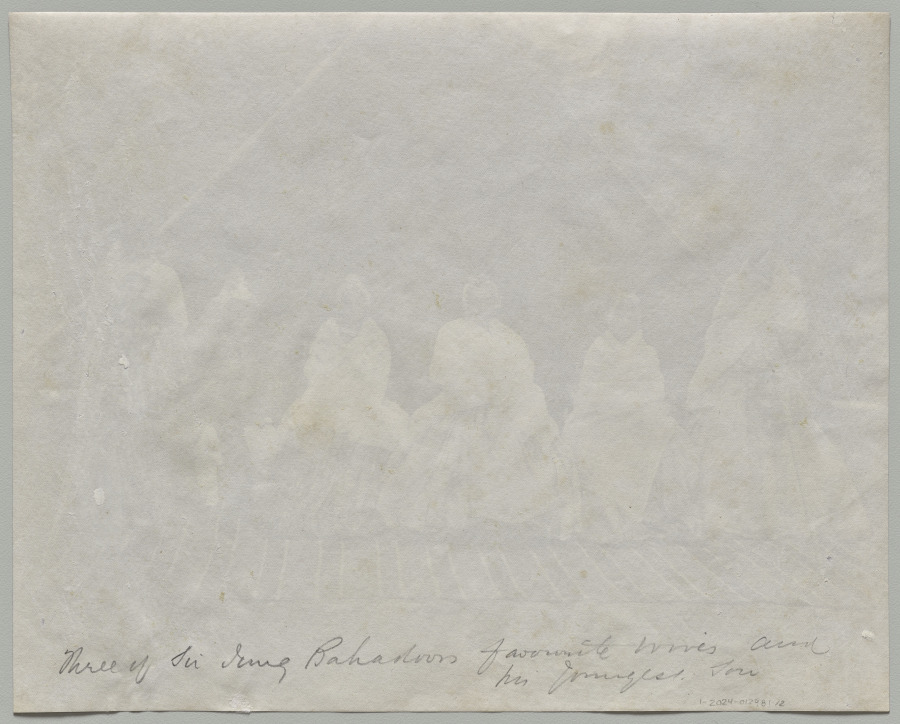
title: Three of Sri Tung Bahadur's Favorite Wives and His Youngest Son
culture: England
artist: Bourne & Shepherd (British, active India, 1868–2016)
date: c. 1870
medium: albumen print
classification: Photograph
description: Jung Bahadur Rana (1817-1877), prime minister and ruler of Nepal from 1846-1877, made the governmental systems of England and France the models for his modernization of his country’s governance. His admiration for Europe led to the women of his court incorporating aspects of European fashion into their dress, such as the voluminous skirts and shawls seen here.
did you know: This portrait shows three of the thirteen wives of the ruler of Nepal.